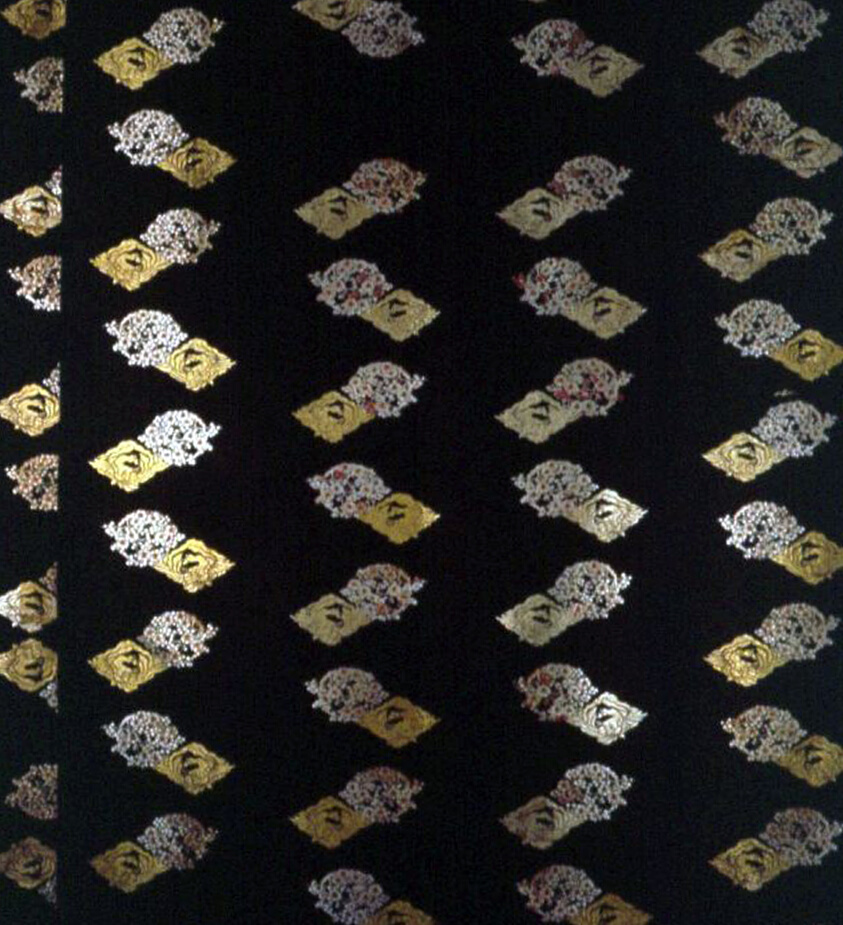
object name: Religious/Ritual Object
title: Uchishiki (Altar Cloth)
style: Japanism, meiji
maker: Japan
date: Meiji period (1868–1912), 1870/90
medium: Silk, warp-float faced 2:1 ‘Z’ twill weave, with supplementary patterning and brocading wefts; embroidered with silk and gold-leaf-on-lacquered-paper strip wrapped silk in laidwork and couching; pieced; lining: silk, plain weave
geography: Japan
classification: textile; liturgical - buddhist; needlework (visual works); ritual objects